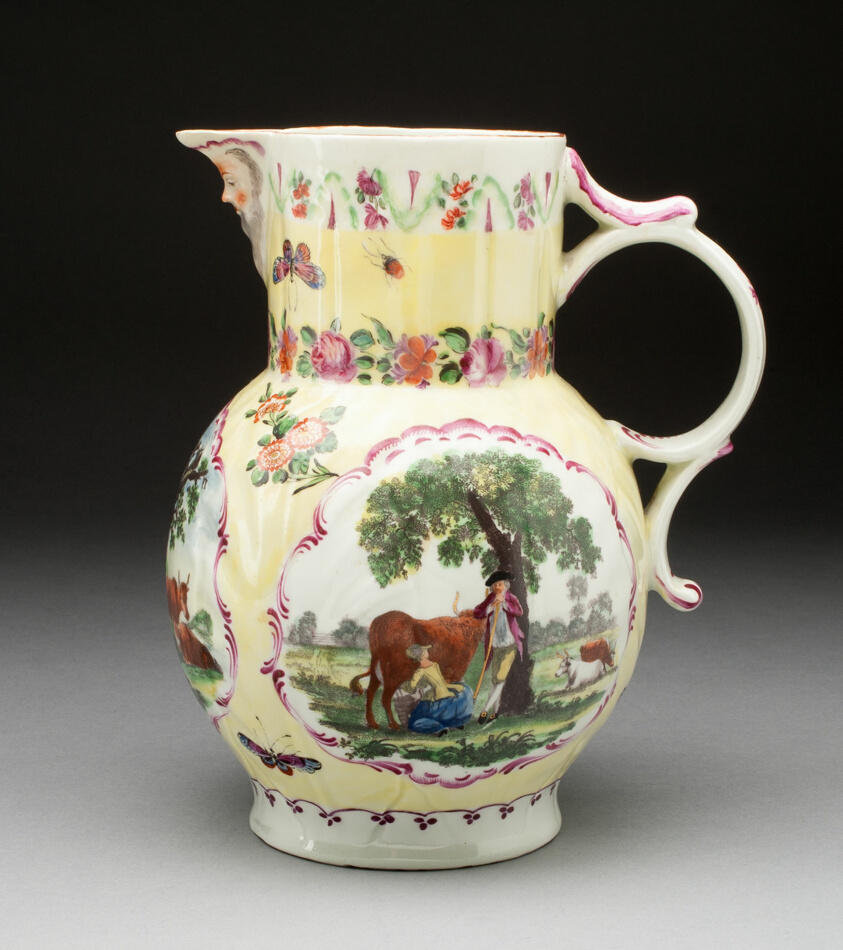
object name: Ceramics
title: Jug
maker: Worcester Porcelain Factory (Warmstry House Period, 1751–1783); Worcester, England, founded 1751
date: c. 1765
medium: Soft-paste porcelain, transfer-printed decoration and polychrome enamels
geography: Worcester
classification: tableware; ceramics; porcelain; european decorative arts